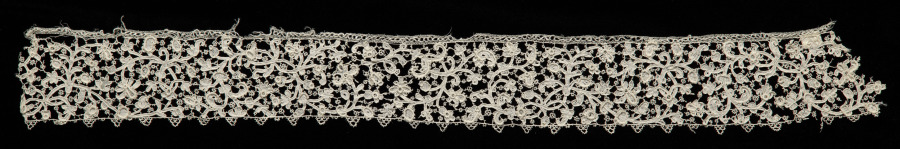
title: Lace Edging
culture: Italy, Venice, 1600s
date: 1600s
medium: Linen: needle lace (Venetian Rose Point-Punto Rosallino)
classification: Lace